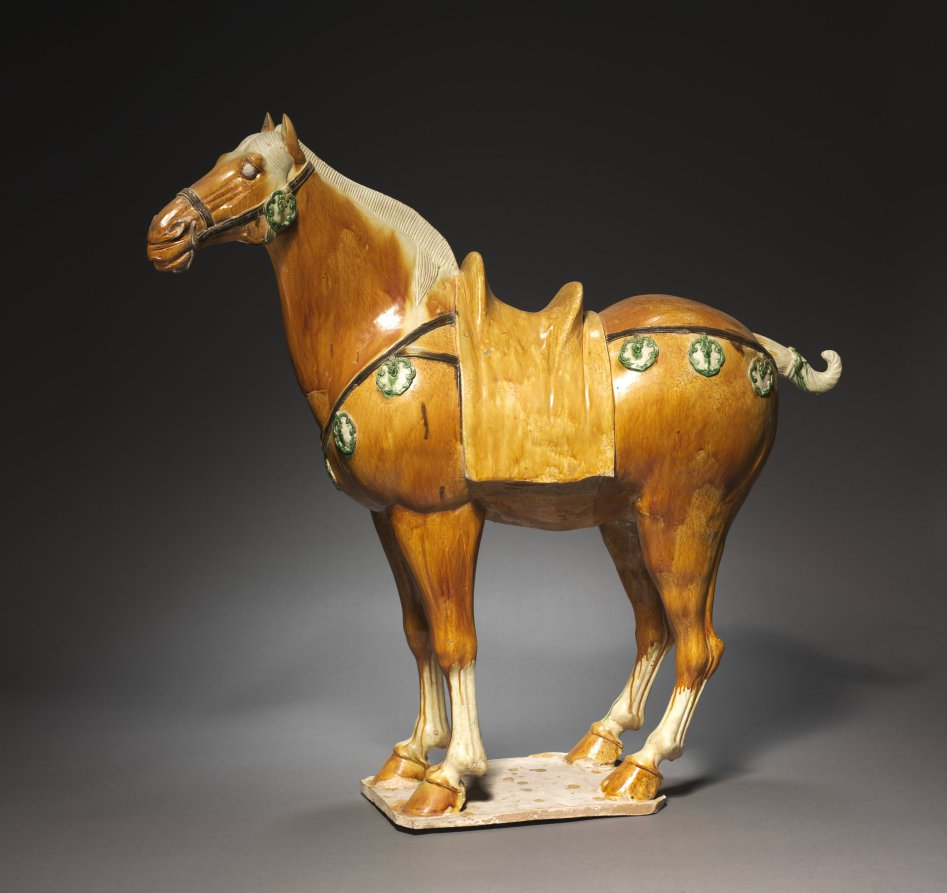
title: Horse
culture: China, probably Henan province, Tang dynasty (618–907)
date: late 600s–800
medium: glazed earthenware, sancai (three-color) ware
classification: Sculpture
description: This ceramic horse was part of a set of figures depicting a procession, all of which was included in the tomb of a person of high rank. In ancient China tombs were equipped with all the items it was thought to be needed in the afterlife—including horses, as an essential mode of transportation.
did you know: Sancai (three-color) glazes in green, amber, and transparent white show the high social status of the tomb’s occupant.